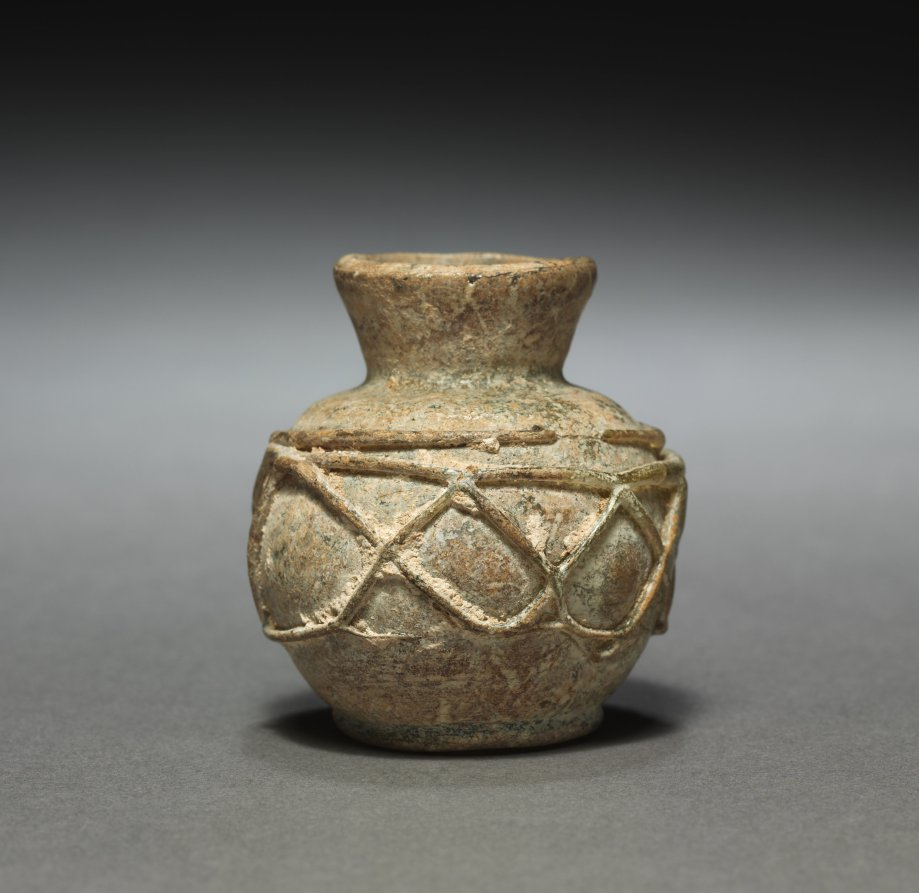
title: Vase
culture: Iran, Sasanian Empire (224–651 CE)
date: c. 224–650 CE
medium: glass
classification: Glass